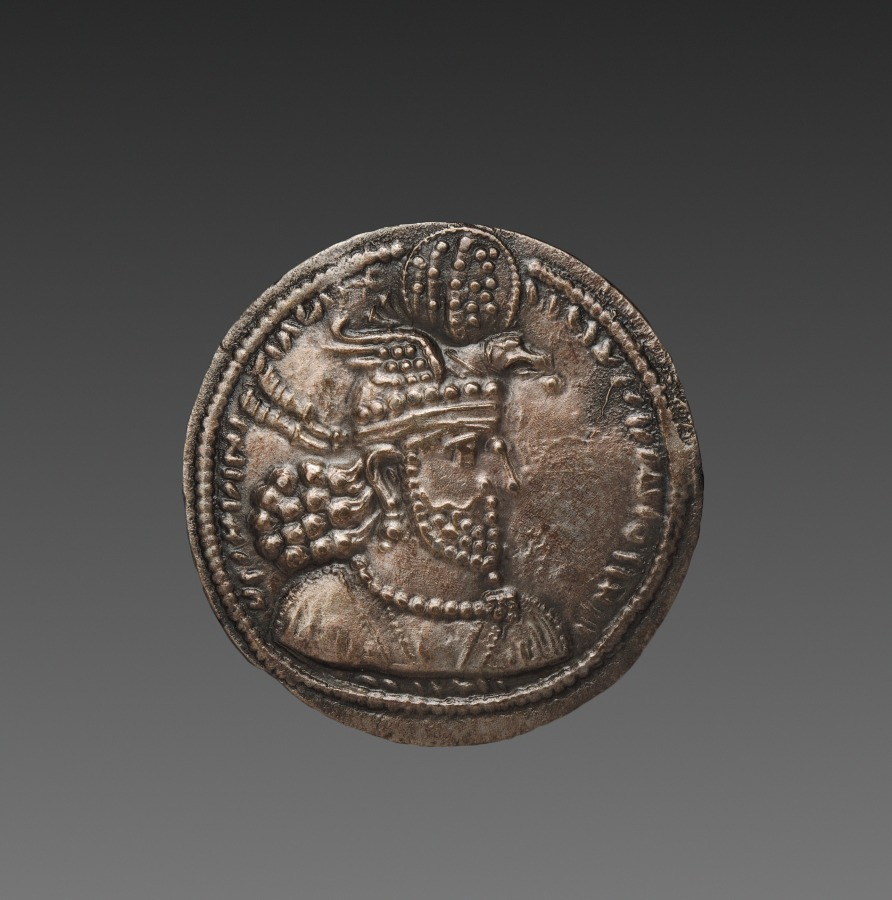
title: Drachm: Bust of Hormizd II (obverse); Fire altar with bust (reverse)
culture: Iran, (minted), Sasanian Empire (224–651 CE), reign of Hormizd II (303–309)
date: 303–9 CE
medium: silver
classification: Coins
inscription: 𐭬𐭦𐭪𐭠𐭠𐭭𐭬𐭫𐭪𐭠𐭠𐭩𐭫𐭠𐭭𐭬𐭭𐭪𐭲𐭥𐭬𐭭𐭩𐭦𐭣𐭠𐭭 𐭬𐭦𐭣𐭩𐭮𐭭𐭡𐭢𐭡𐭥𐭧𐭬𐭦𐭣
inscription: 𐭠𐭲𐭥𐭫𐭦𐭩𐭠𐭥𐭧𐭬𐭦𐭣